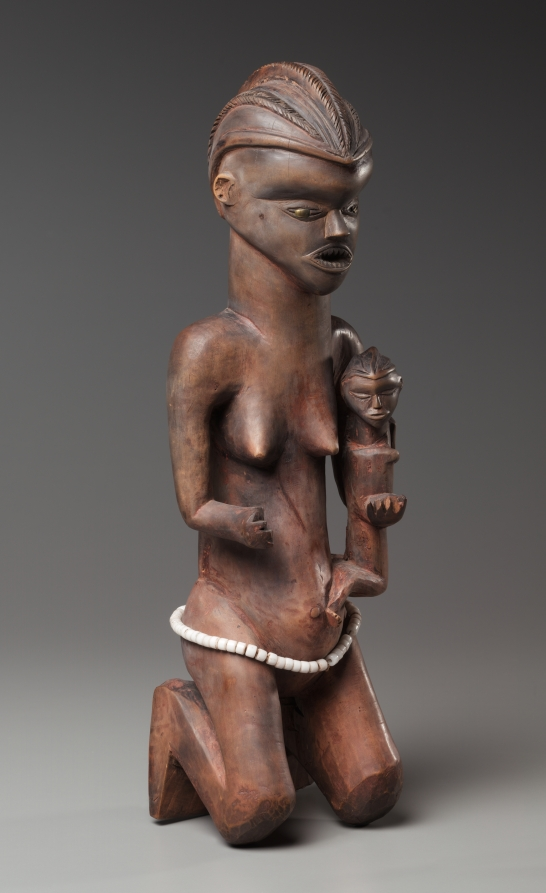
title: Mother-and-Child Figure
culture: Africa, Central Africa, Democratic Republic of Congo, Pende-style maker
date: late 1800s–early 1900s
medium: Wood, glass beads, upholstery studs, natural fiber, and pigment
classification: Sculpture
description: Wearing an elaborate lobed headdress and a beaded waistbelt, and having filed teeth and red-powdered skin, this maternity figure seems to have once carried an ax and a cup, wooden imitations of the two most important chiefly attributes. Perhaps together with a male counterpart, it was secretly kept inside the ritual house, serving as a guardian of the chief’s treasure. Its style places it in the westernmost corner of Pendeland, between the Lutshima and Kwilu rivers.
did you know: Eastern Pende carvers also once made larger mother-and-child sculptures to adorn the tops of chiefs' ritual houses.